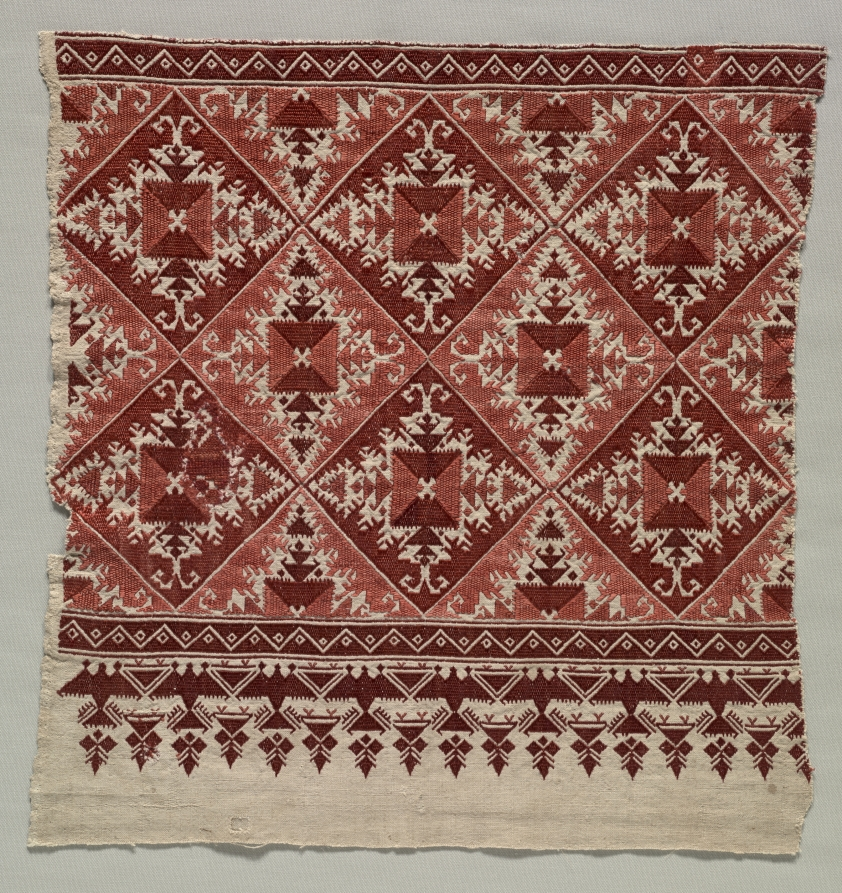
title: Part of a Bed Curtain or Pillow Case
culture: Greece, Cyclades Islands, Naxos, 18th century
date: 1700s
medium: embroidery: silk on linen tabby ground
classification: Embroidery